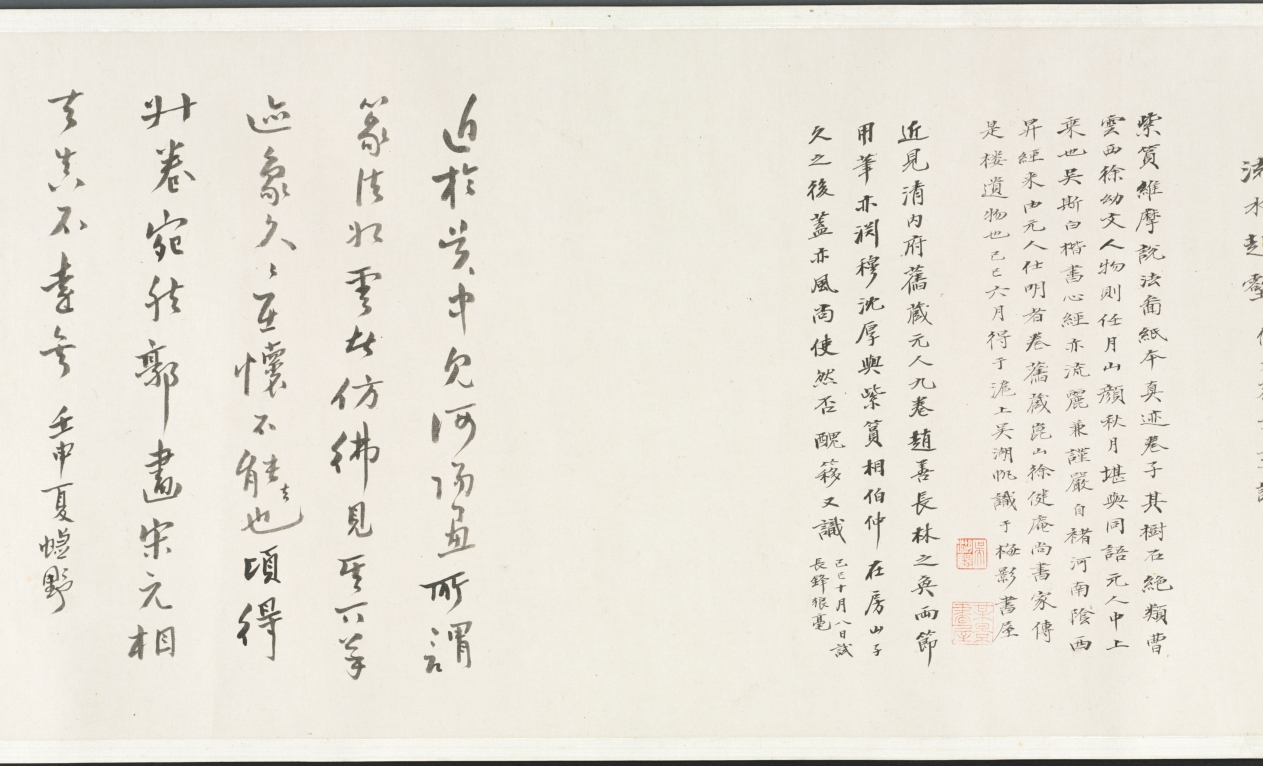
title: Buddha's Conversion of Five Bhiksu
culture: China, Yuan dynasty (1271–1368)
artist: Li Sheng (Chinese, active c. 1324–after 1375)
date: mid-1300s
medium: handscroll; ink on paper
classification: Painting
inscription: 紫篔生李升識 [印] 李氏子雲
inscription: 4 colophons and 12 additional seals: The "Heart" Sutra (Maha Prajnaparamita) text written by Wu Yuqing 吳餘慶 (active early 1400s); 2 seals of Xu Qianxue 徐乾學 (1631–1694); 3 colophons, one dated 1929 and two dated 1936, and 9 seals of Wu Hufan 吳湖帆 (1894–1968); 1 colophon, dated 1932, of Chen Dingshan; 1 seal unidentified.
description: This episode stems from the life of the historical Buddha, who, after his enlightenment, was initially hesitant about preaching his own doctrine. After much personal deliberation and prodding by deities, he finally relented. The first converts were the five guards who served him when he was still a prince. For Li Sheng, this is the pretext of the painting, which moves from the interaction of the bhiksu with the Buddha to a broader awareness of the vast surroundings of the scene.